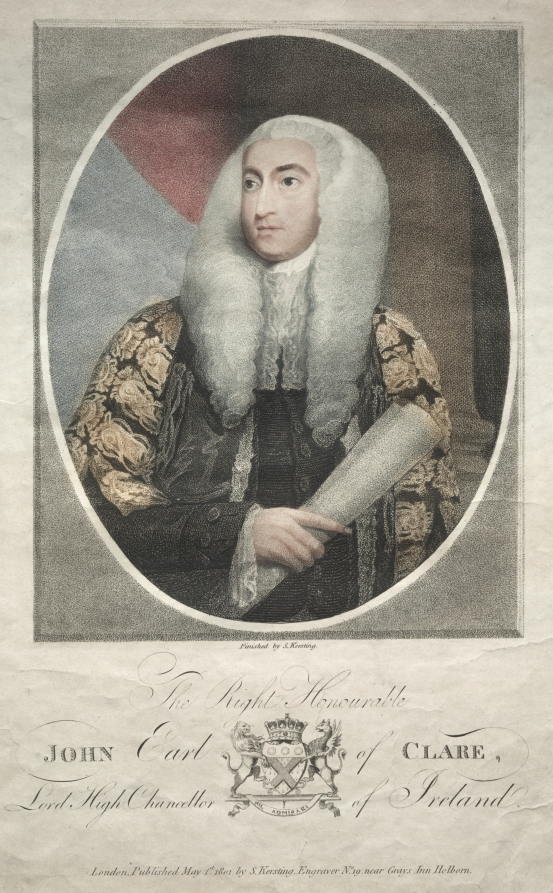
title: John Fitzgibbon, Earl of Clare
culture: England, early 19th Century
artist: S. Kersting (British)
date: 1801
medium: stipple engraving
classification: Print